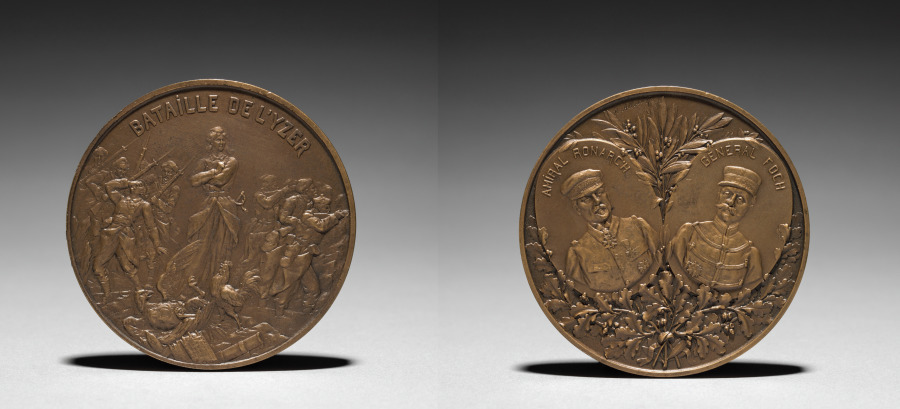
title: Medallion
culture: France, 19th-20th century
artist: Henri Emile Allouard (French, 1844–1929)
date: 1916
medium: bronze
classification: Metalwork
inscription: "Bataille de l'Yzer."